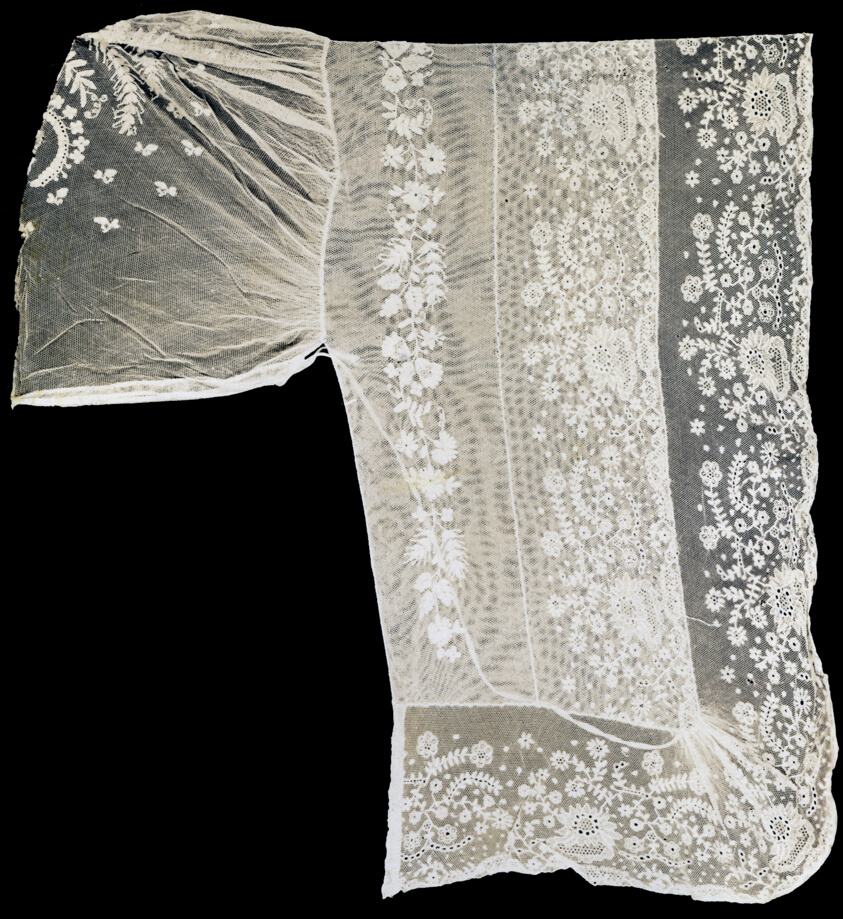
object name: Textile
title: Cap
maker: France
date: 1850/1900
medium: Cotton, machine-made twist net; embroidered with cotton and linen in chain (tambour work), cross, darning, padded satin, and wave filling stitches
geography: France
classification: textile; lace - mixed